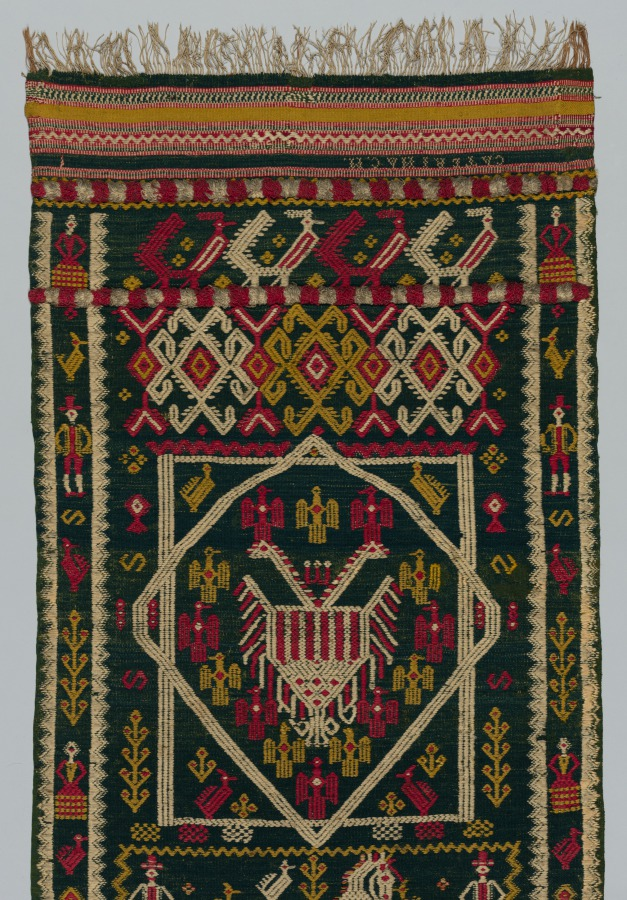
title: Woven Bed or Chest Cover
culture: Italy, Terra di Lavoro, 18th century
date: 1700s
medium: embroidery; wool on linen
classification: Textile